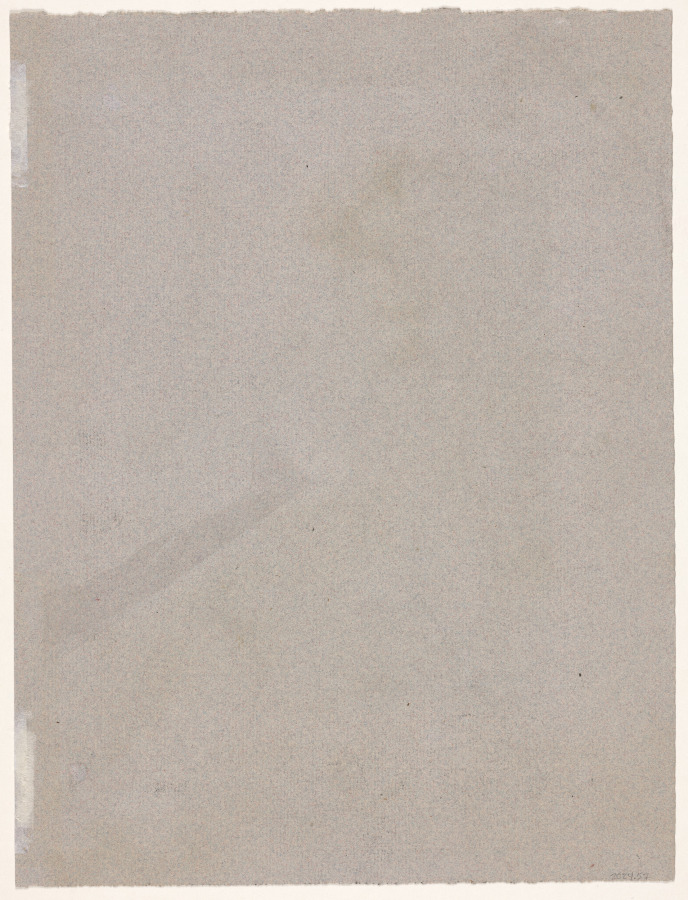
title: The Potato Peeler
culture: France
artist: Ker Xavier Roussel (French, 1867–1944)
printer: Edward Ancourt (French, 1841–1898?)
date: 1893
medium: lithograph on gray laid paper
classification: Print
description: This print presents the type of domestic scene that Ker-Xavier Roussel and his Nabi colleagues favored during the 1890s. Artists in this circle used simplified forms and bold color to depict subject matter drawn from contemporary Paris, both domestic and public. Created in the year that Roussel married Marie, the sister of his close friend Édouard Vuillard, this lithograph may be a portrait of his new wife. The figure appears fully absorbed in her task, but also completely isolated from the outside world in starkly contrasting light and dark tones.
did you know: This print is the first of several in which Ker-Xavier Roussel collaborated with renowned master printmaker Edward Ancourt.